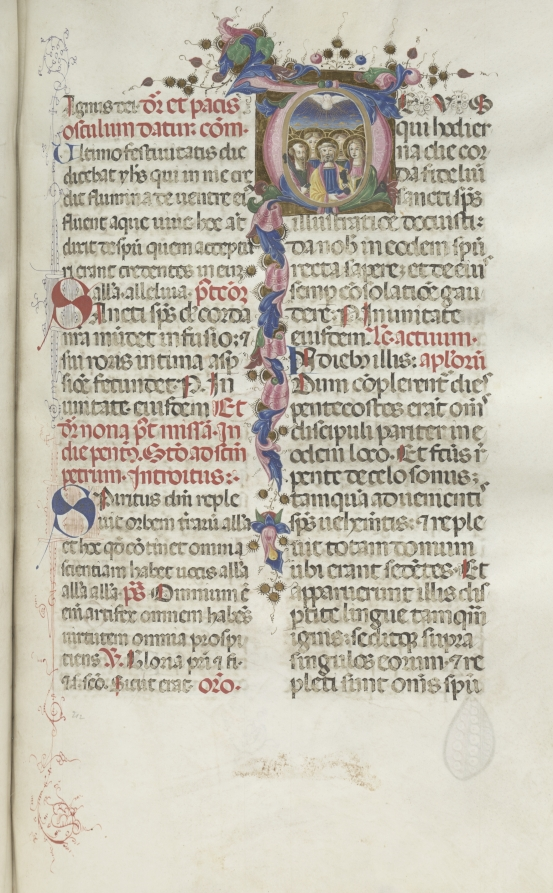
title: Missale: Fol. 214: Pentecost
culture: Italy, Perugia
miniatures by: Bartolommeo Caporali (Italian, c. 1420–1503)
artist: assisted by Giapeco Caporali (Italian, d. 1478)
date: 1469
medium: ink, tempera and burnished gold on vellum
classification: Bound Volume